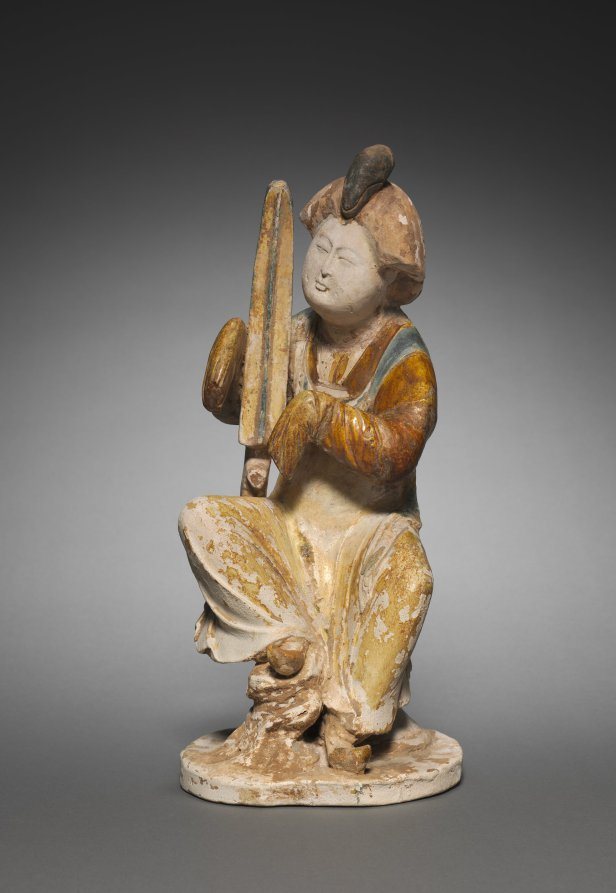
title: Harpist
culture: North China, Tang dynasty (618-907)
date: mid-700s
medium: glazed earthenware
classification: Sculpture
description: After four centuries of political turmoil and social disorder, a reunited China during the first half of the Tang Dynasty (618–906) was an age of unprecedented prosperity and vitality. Figurines placed in Tang tombs give a vivid glimpse of everyday life. The elegant earthenware ladies in various hairstyles, costumes, and activities suggest the fashions of the time. This lady musician is seated on a circular plinth, playing a harp balanced on her right thigh. The plump face has well-defined features, with straight nose, pursed lips, and round cheeks. Her hair is drawn into a coiled chignon over the forehead. A long, high-waisted robe flows down to her shoes' upturned tips.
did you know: The angular harp, like the one held by this musician, occupied a prominent position in the court orchestras by the mid-eighth century.